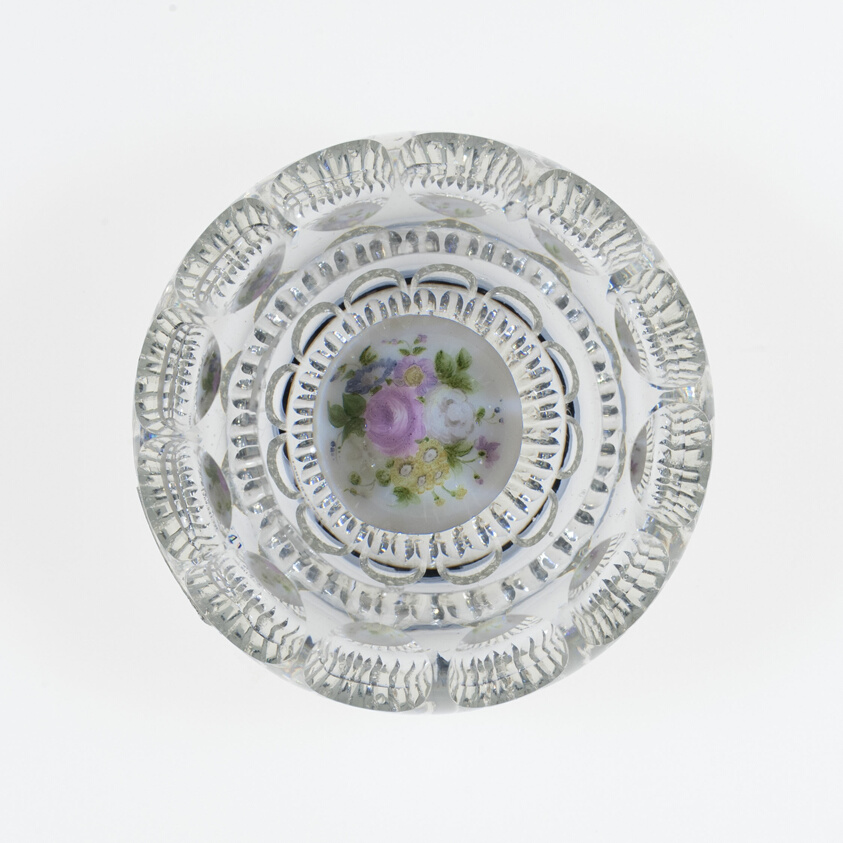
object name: Glass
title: Paperweight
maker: Saint-Louis Glassworks (Cristalleries de Saint-Louis); Lorraine, France, founded 1586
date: c. 1848–55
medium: Glass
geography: Saint-Louis-lès-Bitche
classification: paperweight; glass